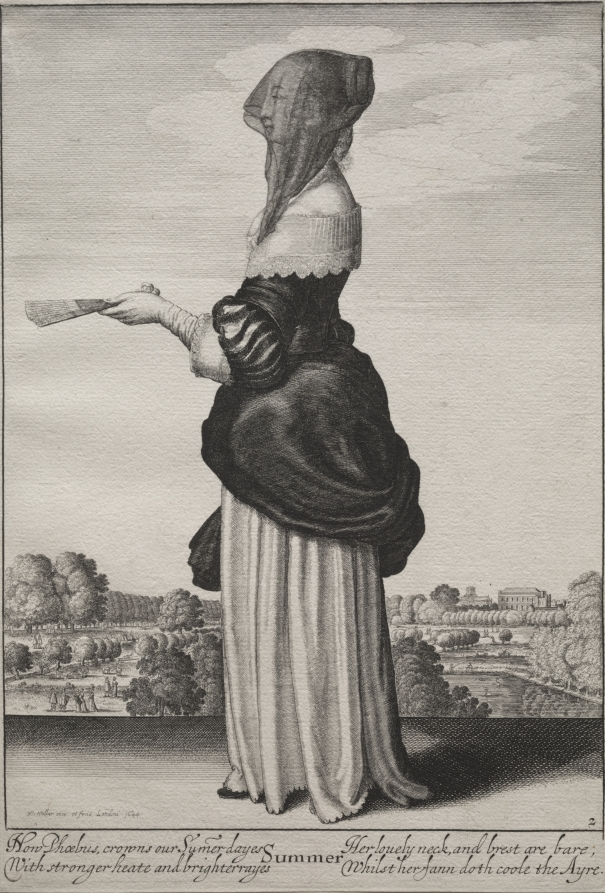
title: The Seasons: Summer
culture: Bohemia, 17th century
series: The Seasons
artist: Wenceslaus Hollar (Bohemian, 1607–1677)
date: 1643–1644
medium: etching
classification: Print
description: Increments of time, such as the seasons, were one of the most popular subjects for printed sets. Wenceslaus Hollar alone made six different versions. Hollar was a professional printmaker with over 3,000 prints to his credit. Born in Bohemia, he worked in Germany, London, and Antwerp. He came to London in 1636 while in the employ of the Earl of Arundel, an important collector that Hollar met in Germany. Apparently free to pursue independent projects, Hollar designed and etched this series around 1643–44. Here, each season is personified by elegantly clad ladies, appropriately dressed for their particular climate, with recognizable landmarks in and around London in the backgrounds. The inscriptions, in an older version of English, are slightly suggestive, in keeping with the lighthearted character of the imagery. The background depicts St. James Park, with the Banqueting House and Old St. Paul's Cathedral along the horizon. The inscription reads: "How Phoebus, crowns our Summer days / With stronger heat and brighter rays / Her lovely neck, and breast are bare, / Whilst her fan does cool the Air."